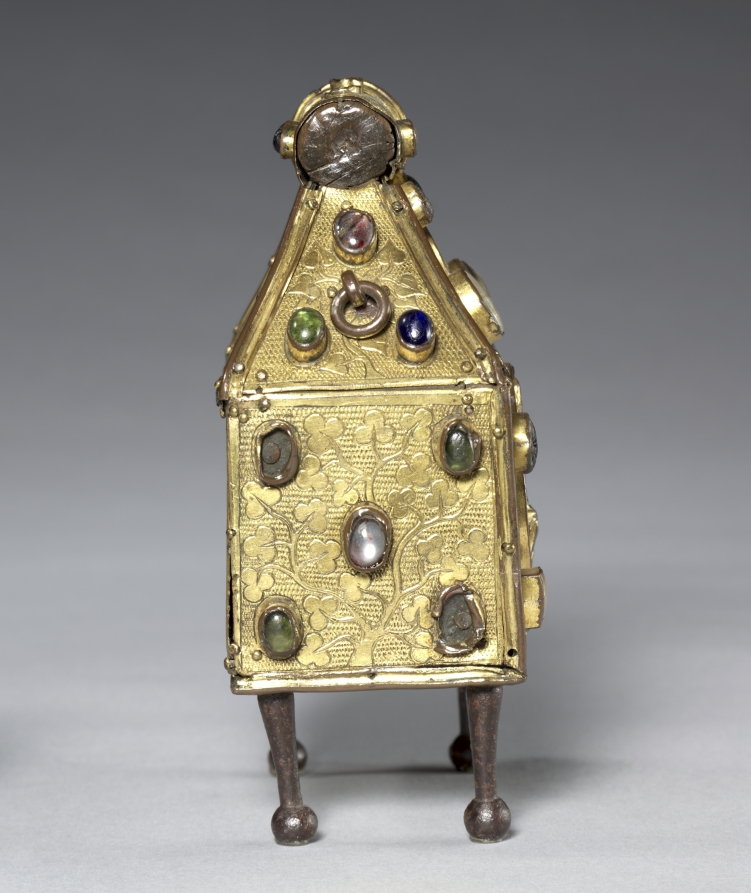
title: Reliquary in Purse Form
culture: Germany, Upper Rhine, Southern Swabia, Gothic period, 14th century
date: c. 1320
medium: copper, gilded and engraved; glass; rock crystal; precious stones; wood core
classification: Metalwork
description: This precious reliquary, adorned on its front and sides with colored glass, precious stones, and two medallions featuring the enthroned Virgin and Child and an eagle, forms part of a group of closely related objects manufactured in the Upper Rhine region shortly after 1300. The purse shape, with its peaked roof and cylindrical top, derives from much earlier Carolingian and Romanesque prototypes. The reliquary was originally suspended from the rings on both sides of the sloping roof.